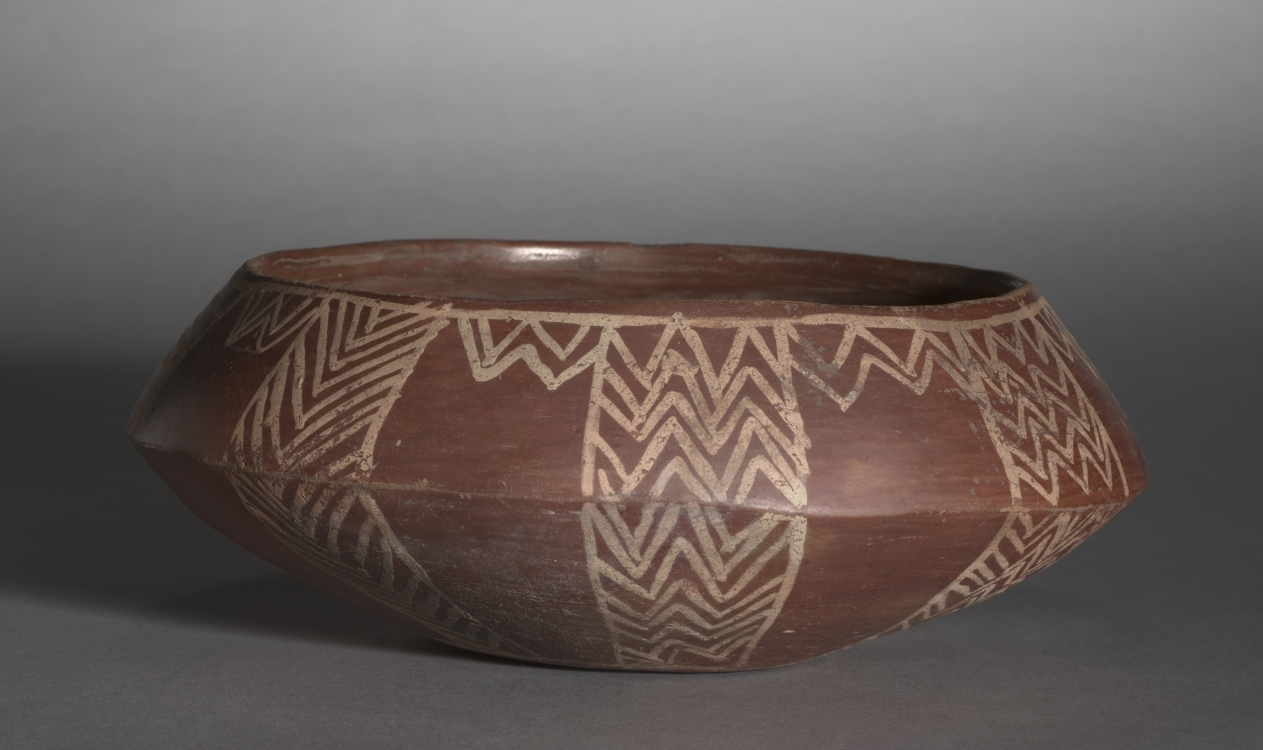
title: White Cross-Lined Bowl with Turtle and Sun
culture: Egypt, Predynastic (5000–2950 BCE), Naqada I–II (3900–3300 BCE)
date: c. 4000–3400 BCE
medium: Nile silt pottery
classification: Vessels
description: Red polished vessels with white painted decoration (known as white cross-lined ware or C-ware) represent Egypt’s oldest known tradition in painted pottery. The decoration on this bowl, painted after firing, features the sun on the side and a turtle on the bottom of the vessel. The turtle was considered the enemy of the Egyptian sun god Ra because it preferred the murky river bottom to the sunlight.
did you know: This bowl was built by hand from coils, then smoothed and burnished.